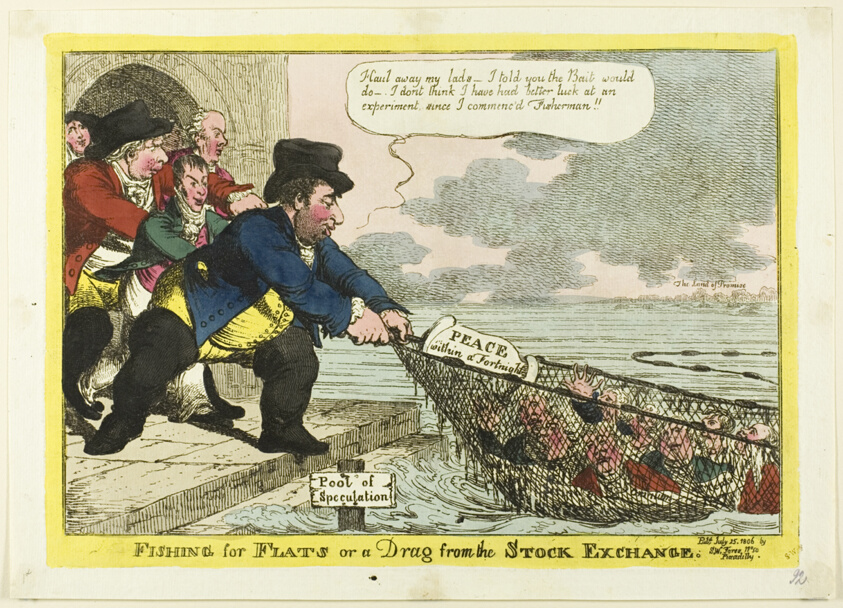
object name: Print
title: Fishing for Flats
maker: Charles WIlliams (English, active 1797-1830); published by S. W. Fores (English, active 1785-1825)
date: published July 25, 1806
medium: Hand-colored etching on ivory laid paper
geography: England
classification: etching; print; prints and drawing